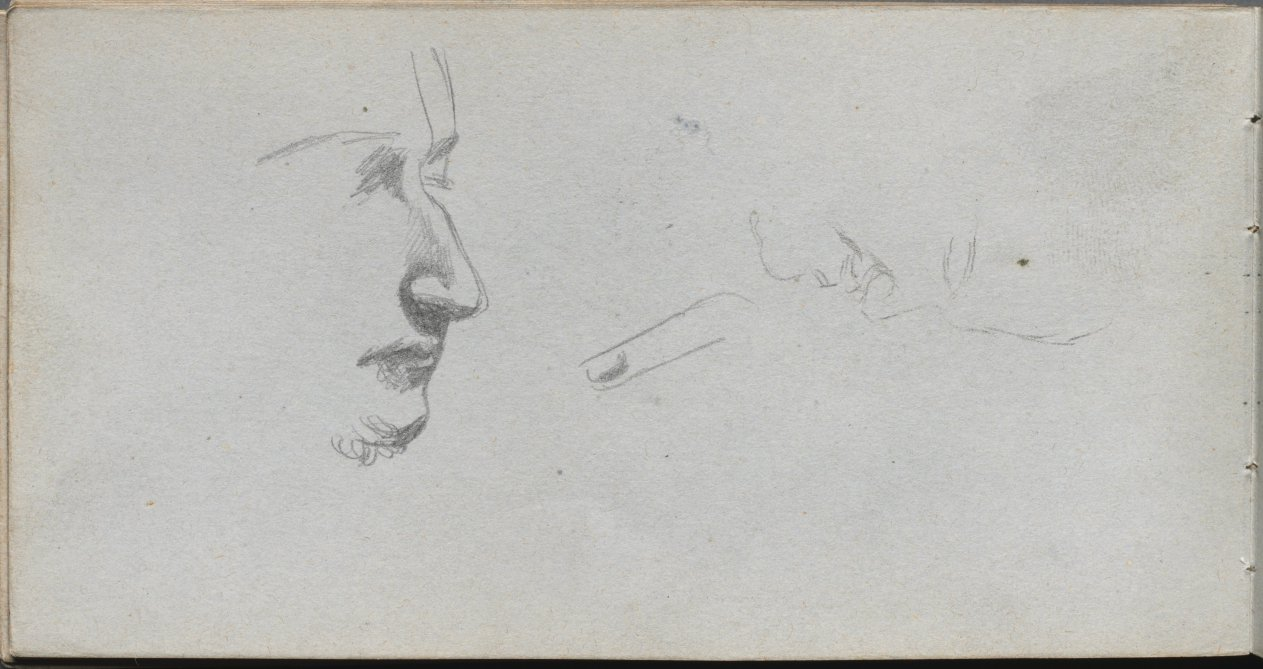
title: Sketchbook, page 80: Study of Faces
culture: France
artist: Ernest Meissonier (French, 1815–1891)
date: c. 1860s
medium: graphite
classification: Bound Volume